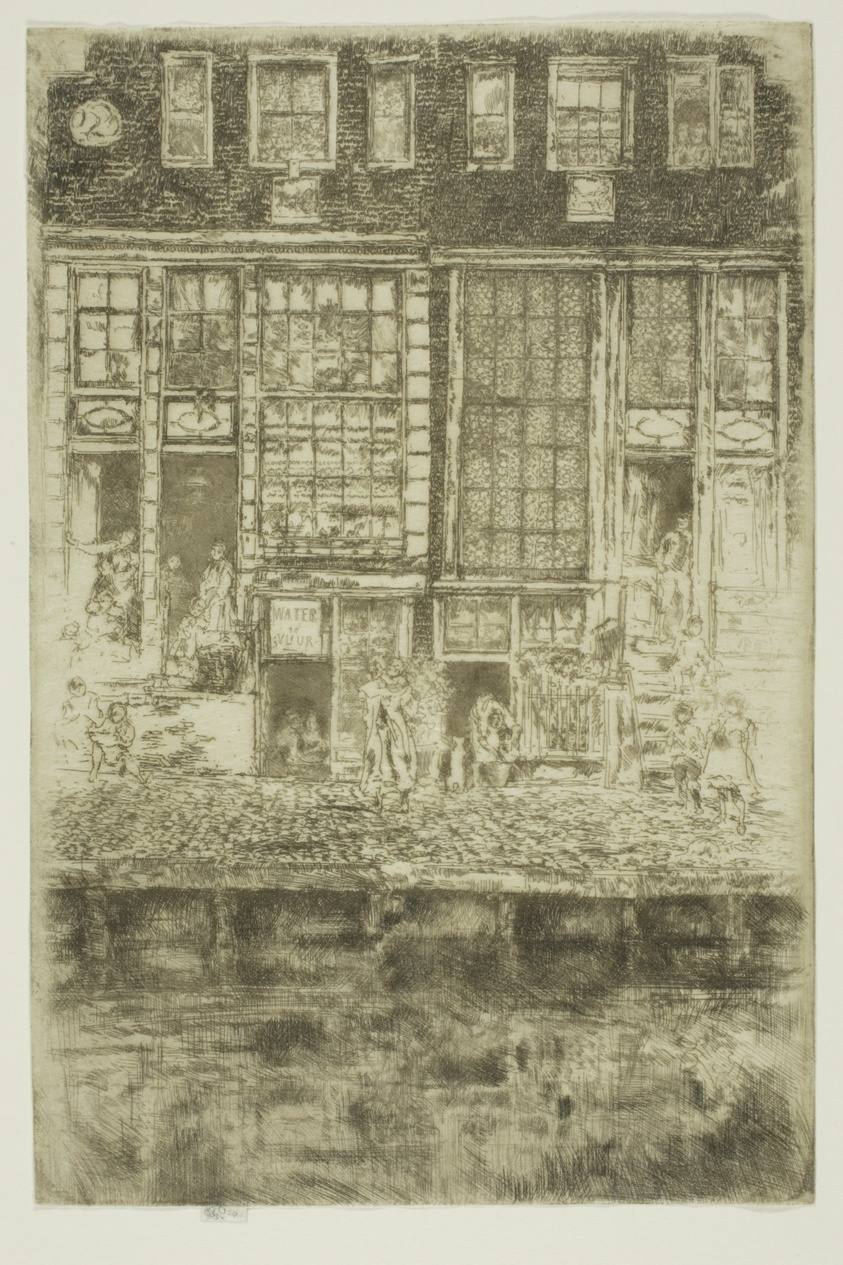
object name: Print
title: The Embroidered Curtain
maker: James McNeill Whistler (American, 1834-1903)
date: 1889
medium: Etching with foul biting in black ink on ivory Japanese paper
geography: United States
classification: etching; foul biting; print; prints and drawing; paper